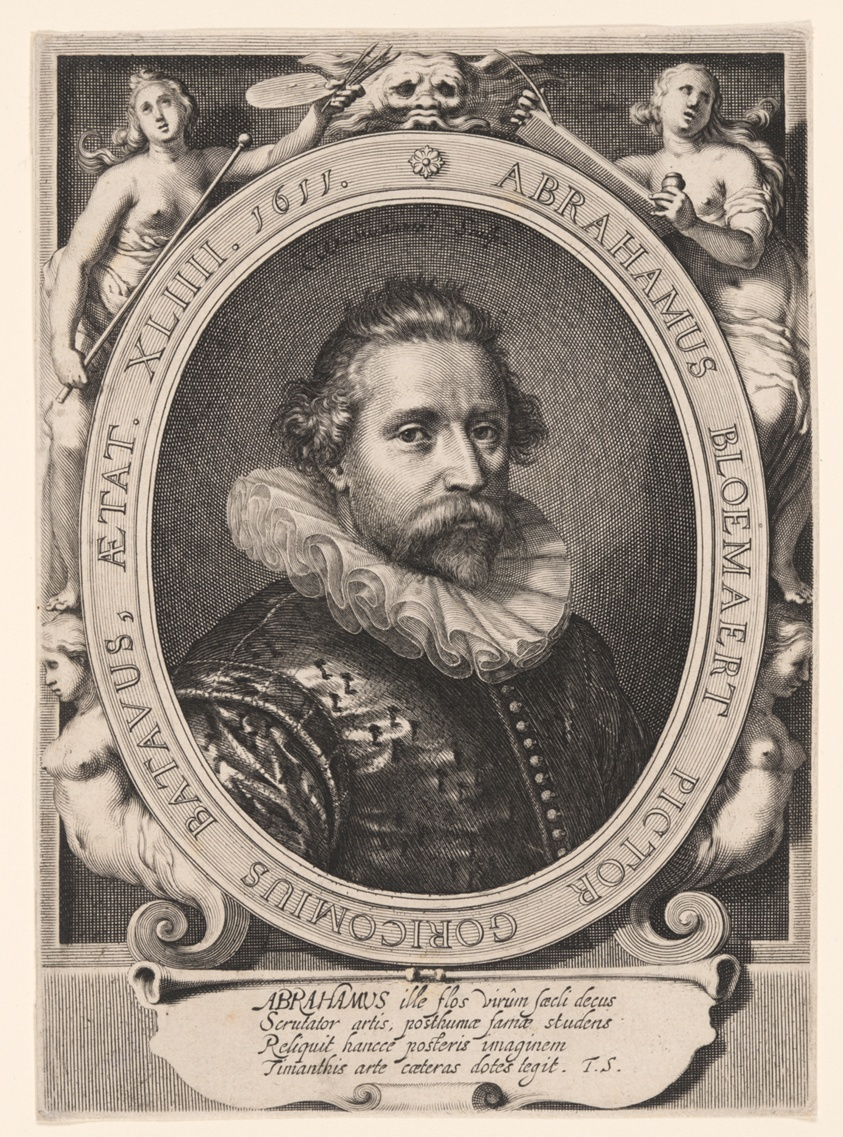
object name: Print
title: Portrait of Abraham Bloemaert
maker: Willem Isaacsz. van Swanenburgh; Dutch, 1580–1612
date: 1611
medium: Engraving on paper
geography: Netherlands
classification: engraving; paper; print; prints and drawing